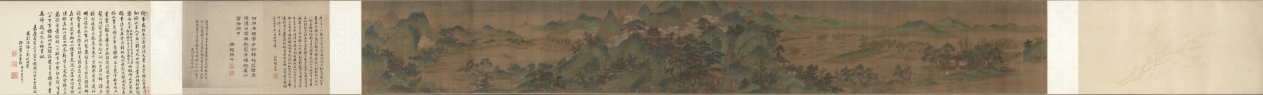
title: Landscape, The Palace of the Clouds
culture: China, Qing dynasty (1644-1911)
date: 1644–1911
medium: handscroll, ink on silk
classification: Painting